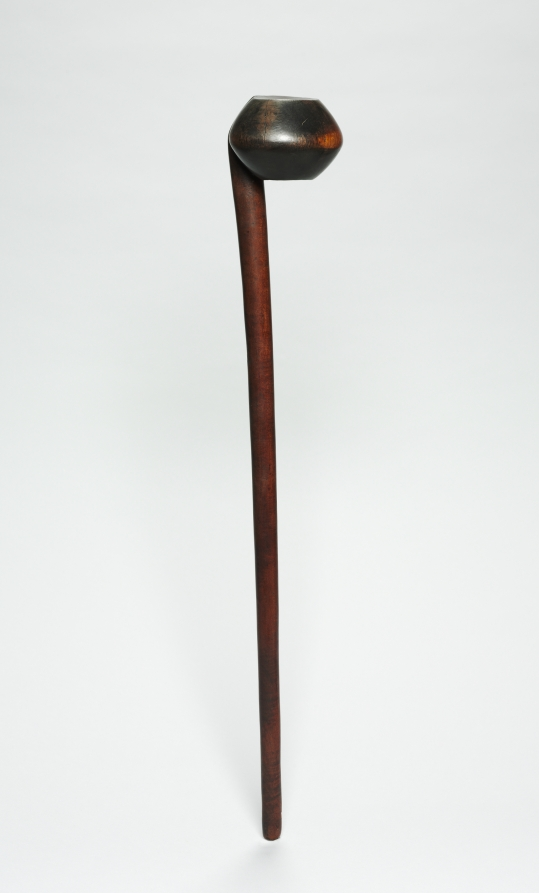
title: Club (Knobkerrie)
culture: Southern Africa, South Africa, Northern Ngun-style or Zulu-style maker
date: late 1800s or early 1900s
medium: Wood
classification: Arms and Armor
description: Relatively short sticks historically used for hunting and fighting are customarily called knobkerries. A combination of Afrikaans and Shona words, the name refers to the characteristic spherical knob of wood (knop) or head atop a cylindrical shaft (kirri). The knobs on these were carved into a tight whorl and a compressed sphere with a central rib. Even though their basic shapes were derived from real weapons, many of these precious objects were rarely if ever used as such. Highly personal, they instead functioned as ceremonial display items or regalia, symbolizing the masculinity and prowess of their owner.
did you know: The term knobkerrie refers to a characteristic spherical knob of wood or head atop a cylindrical shaft.